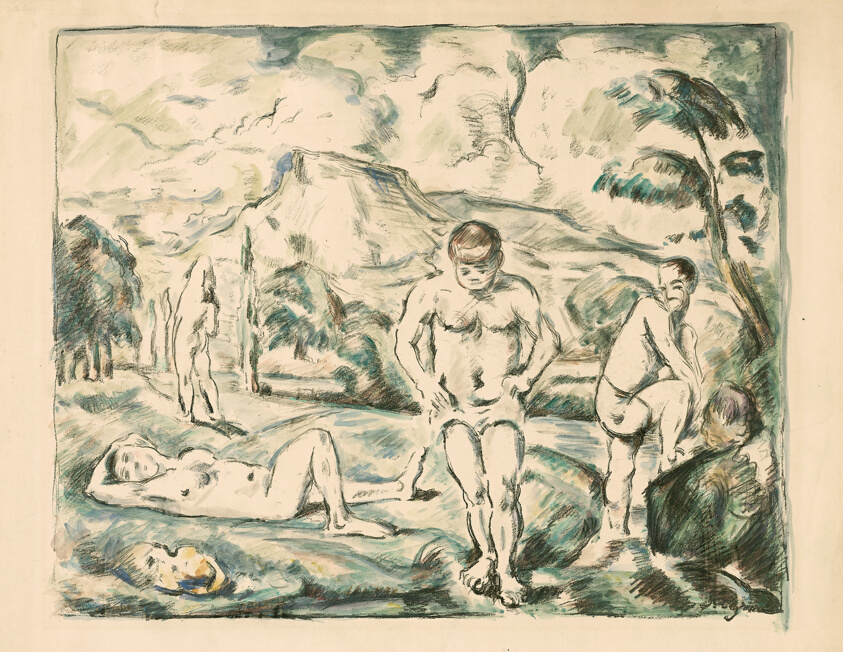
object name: Print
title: Large Bathers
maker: Paul Cézanne (French, 1839–1906); printed by Auguste Clot (French, 1858–1936)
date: 1896–c. 1898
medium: Color lithograph with hand-coloring on cream wove paper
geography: France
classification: lithograph; print; prints and drawing